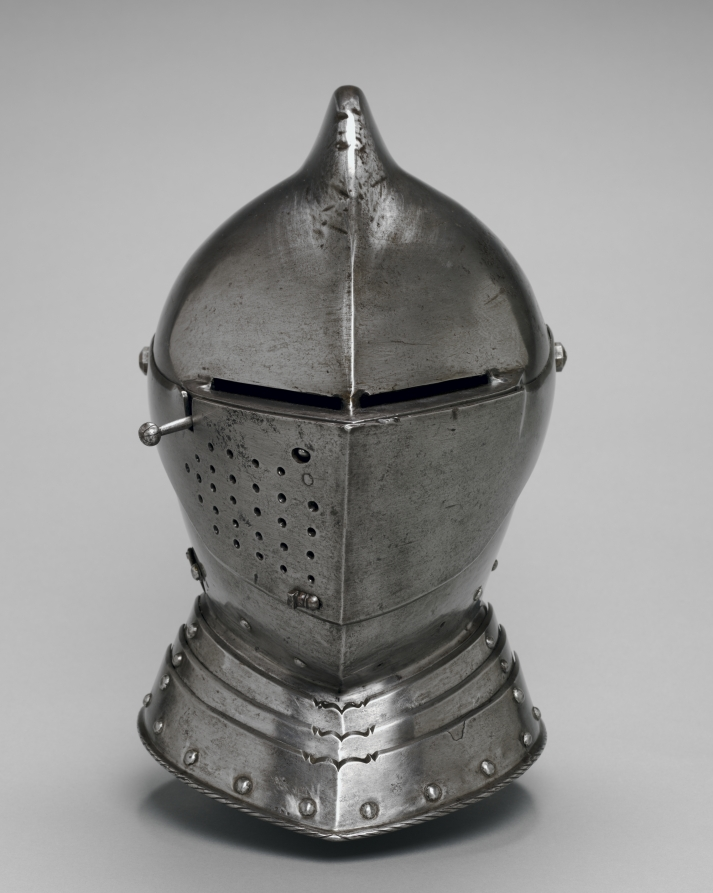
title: Helmet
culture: Germany, Saxony, 16th century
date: c. 1560–80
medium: steel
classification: Arms and Armor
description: This helmet was developed for the joust, a sporting combat of arms between two mounted contestants. This example shows the asymmetry of jousting armor. The participants rode along a wall-like barrier known as a "tilt" with their left sides facing. Consequently, armor on that side of the body tended to be thicker. The breath holes in the helmet were placed on the right side (farthest from an opponent's lance) to avoid injuries from splinters. The popularity of jousts and tournaments peaked around 1500 and required armor and other sporting equipment adapted for the endlessly varied games. By the reign of Emperor Maximilian I (1493–1519), there were at least 11 different forms of mounted jousts, exclusive of the numerous ceremonial combats on foot using such weapons as swords, halberds, pikes, and throwing axes. Each blow in the contest, especially favored in Germany, was carefully numbered and prescribed by rules.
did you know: Jousting contestants wore armor and charged at each other full speed on horseback, attempting to dismount the other with a lance. Such equipment protected contestants from injury, much like the helmet worn by football players today.